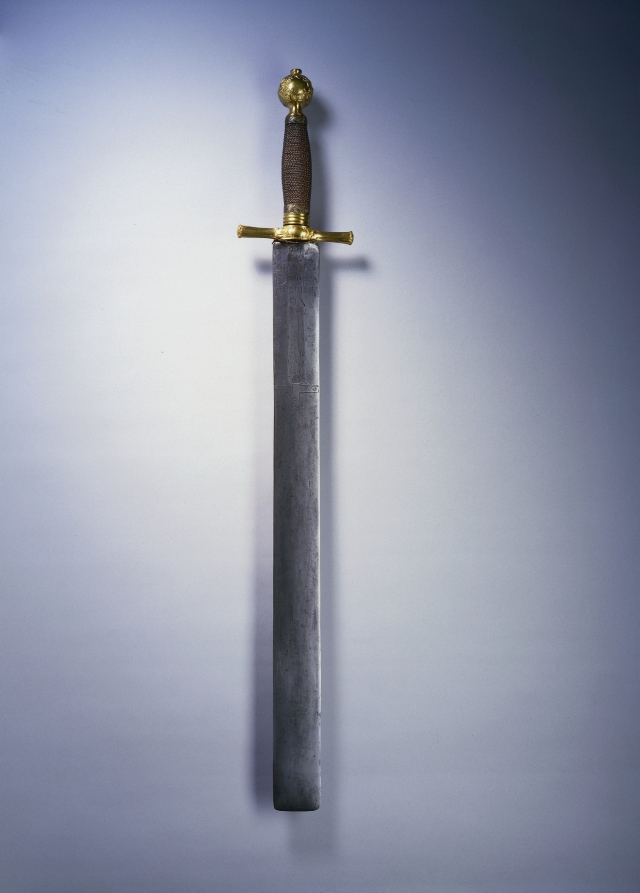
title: Executioner's Sword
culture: Germany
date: blade dated 1634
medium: steel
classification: Arms and Armor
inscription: VIAT JUSTICIDET VERBUM CARO FACTUM, 1634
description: An executioner's sword is specifically designed and balanced for decapitation, not combat. It usually features short quillons or cross guards, as the hands did not need added protection, and a blunt end. In wide use during the 1600s, by the 1700s they were largely out of use except for ceremonial purposes.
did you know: The blades of executioner's swords were often decorated with moralistic inscriptions.